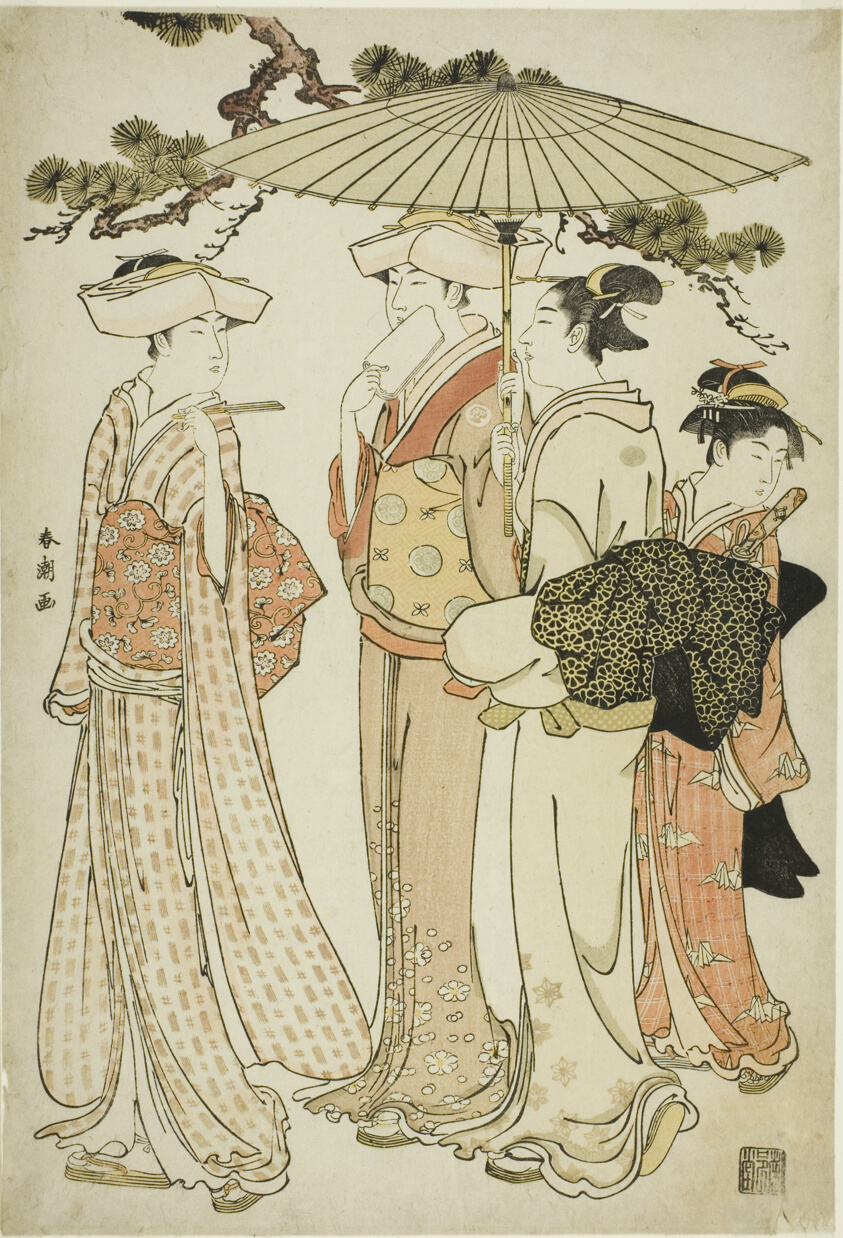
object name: Print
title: Out for a Walk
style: Japanese (culture or style)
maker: Katsukawa Shuncho; Japanese, active c. 1780-1801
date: c. 1780/1801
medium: Color woodblock print; oban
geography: Japan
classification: woodblock print; print; asian art